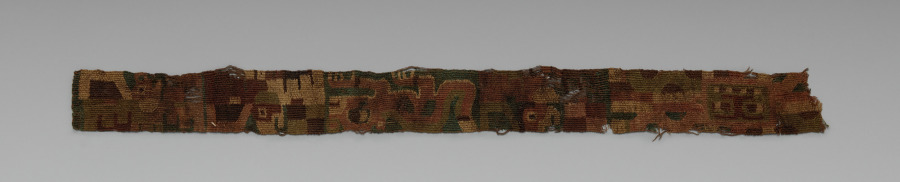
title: Fragment of a Belt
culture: Peru, South Andes, Tiwanaku style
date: c. 400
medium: camelid wool; tapestry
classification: Textile